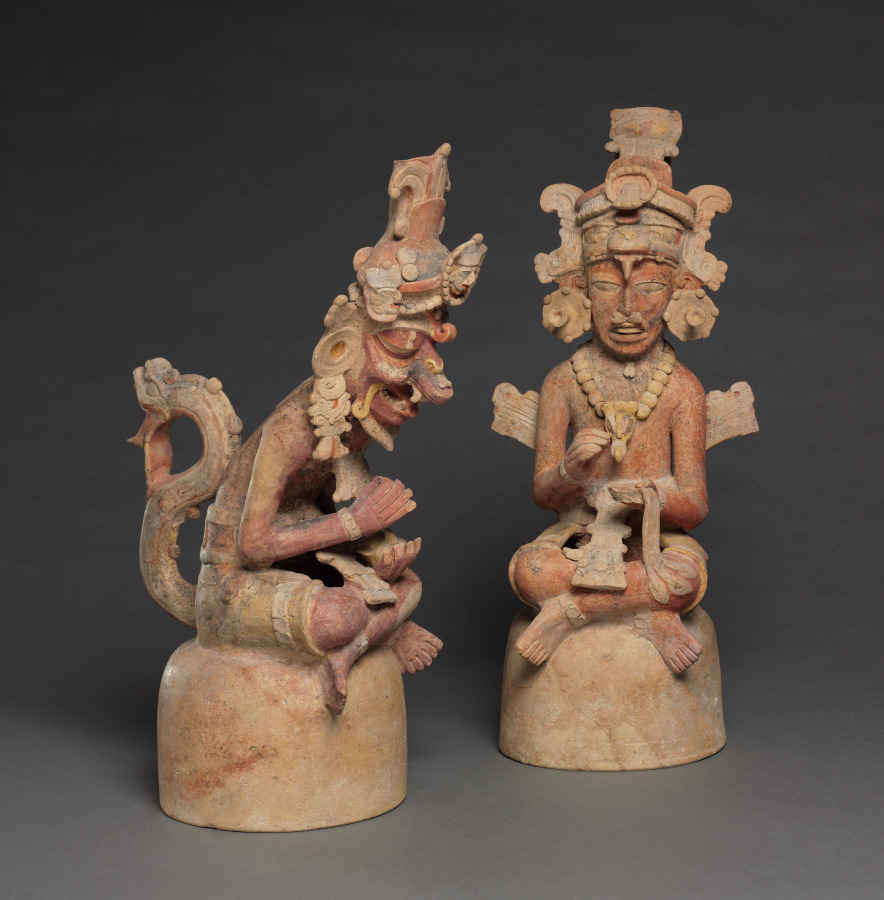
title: Two Artisans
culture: Guatemala, Petén region, Maya style (250-900), Maya style (250-900)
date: 250–600 CE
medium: earthenware with colored slips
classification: Sculpture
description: These figures represent the supernatural patrons of the visual arts and writing: the brothers Hun Batz and Hun Chuen ("One Monkey" and "One Artisan"). The two were refined artists but also bullies who tormented their younger brothers, who took revenge by transforming their elders into monkeys. Many Maya representations of the painter-scribes immortalize this fate by depicting the pair with both simian and human features, as here. The brothers are shown engaged in artistic or scribal pursuits. Sitting on high-domed bases that may have served as the lids of incense or offering bowls, each apparently once grasped a tool in his upper hand—for instance, a paint brush or a stylus for writing. In the lower hand, one cradles a small mask and the other, a piece of bark that likely refers to the beaten bark from which the Maya made books.